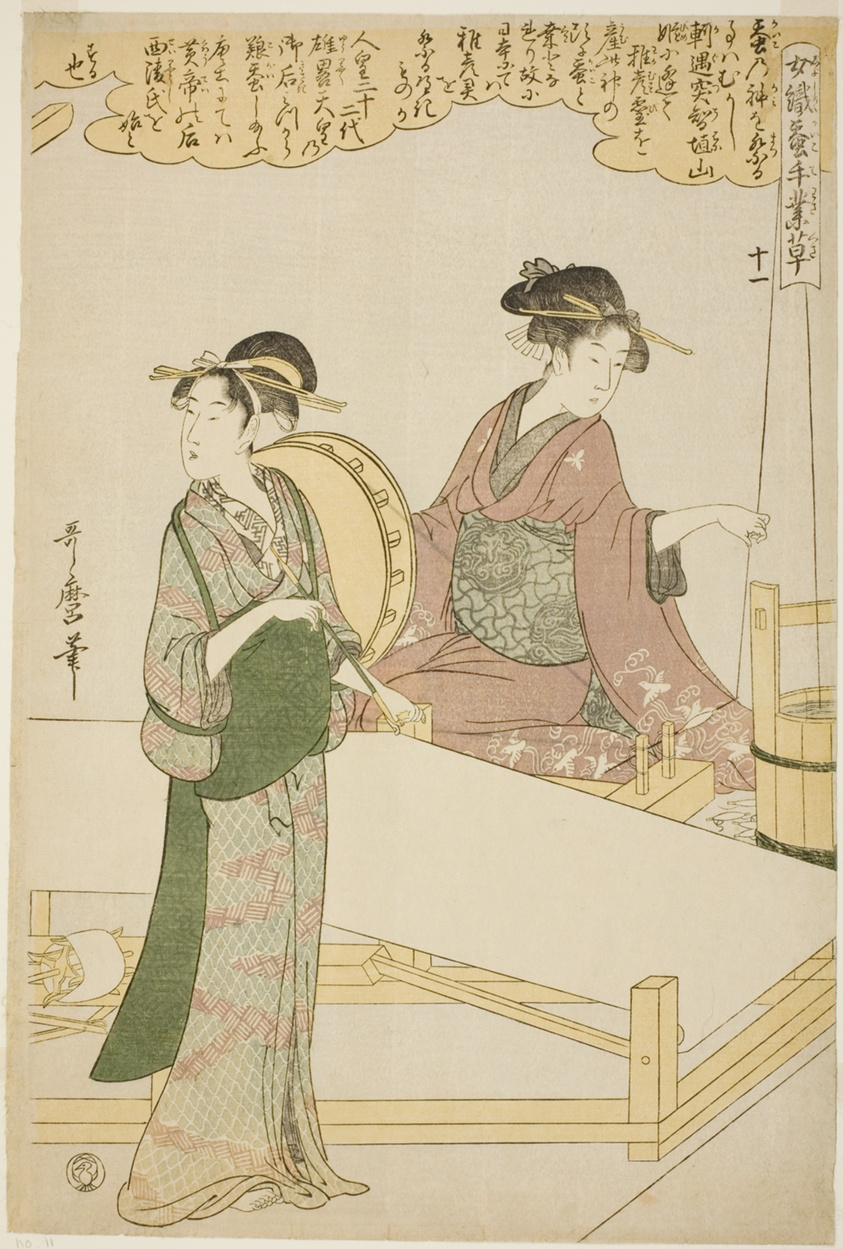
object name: Print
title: No. 11 (juichi), from the series "Women Engaged in the Sericulture Industry (Joshoku kaiko tewaza-gusa)"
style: Japanese (culture or style)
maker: Kitagawa Utamaro 喜多川 歌麿; Japanese, 1753 (?)-1806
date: c. 1798/1800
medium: Color woodblock print; oban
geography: Japan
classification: woodblock print; print; asian art